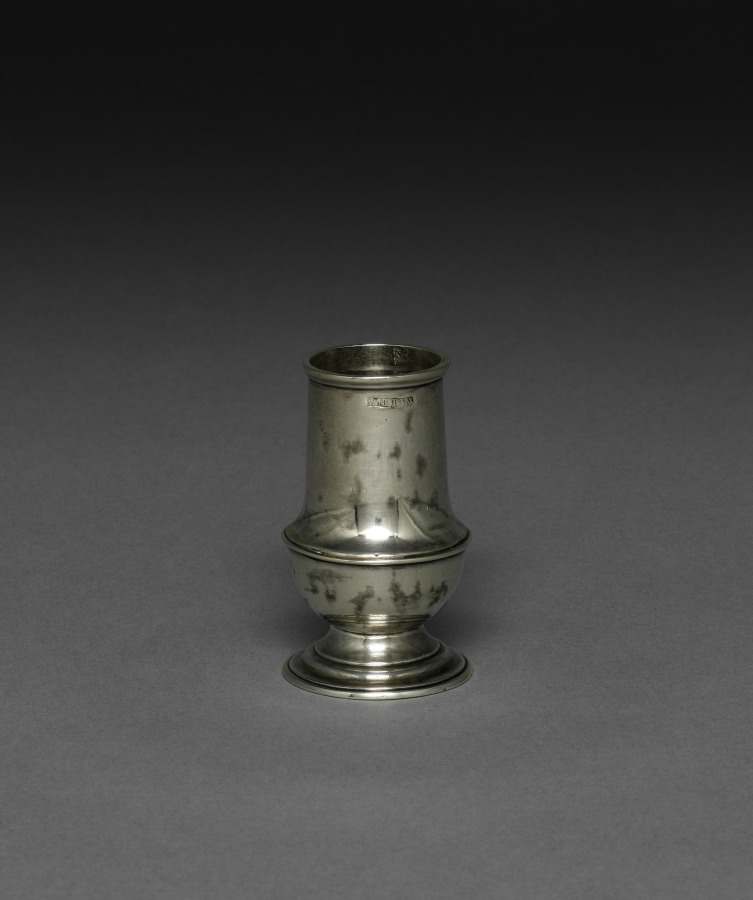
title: Caster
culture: America, Massachusetts, Salem, 18th century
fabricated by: John Andrew (American, 1747–1791)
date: c. 1770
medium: silver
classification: Silver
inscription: Engraved underside of base: "C * S"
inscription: Stamped on side of vessel: "Andrew"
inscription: Scratched underside of base: "3-10"